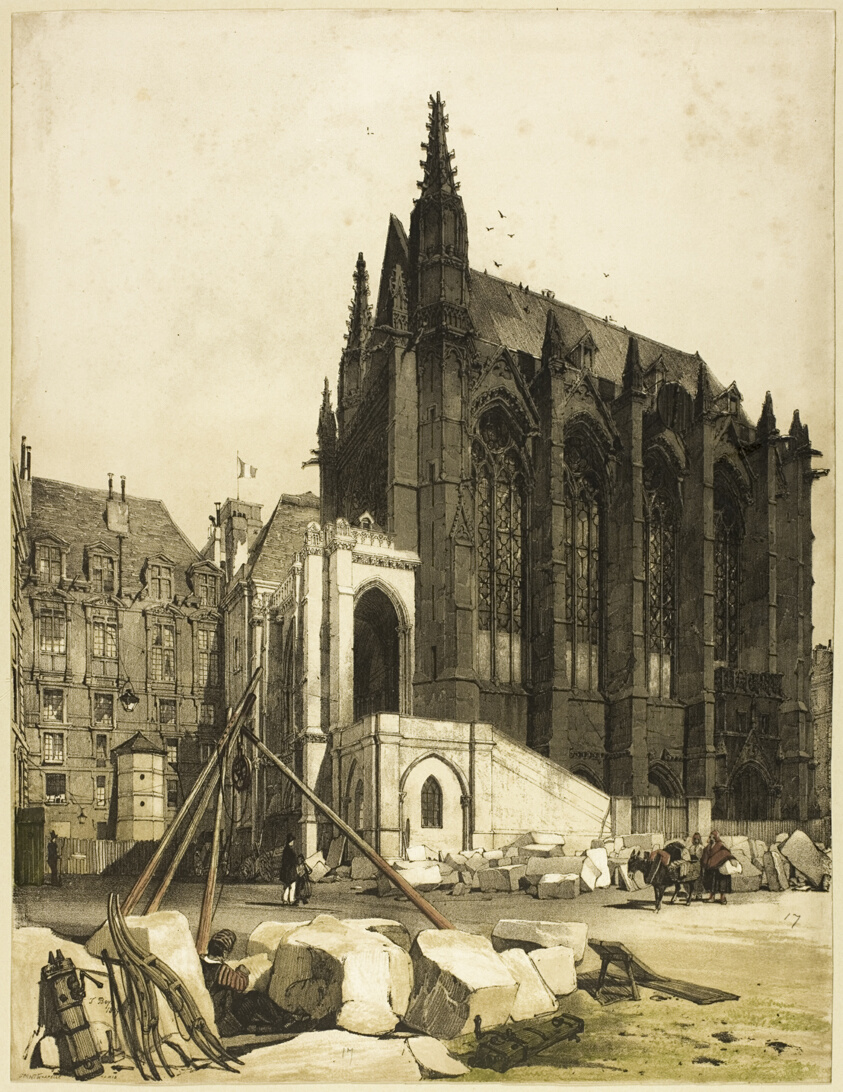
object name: Print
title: La Sainte Chapelle, Paris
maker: Thomas Shotter Boys (English, 1803-1874); published by Charles Joseph Hullmandel (English, 1789-1850)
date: 1839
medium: Color lithograph on paper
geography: England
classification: lithograph; print; prints and drawing